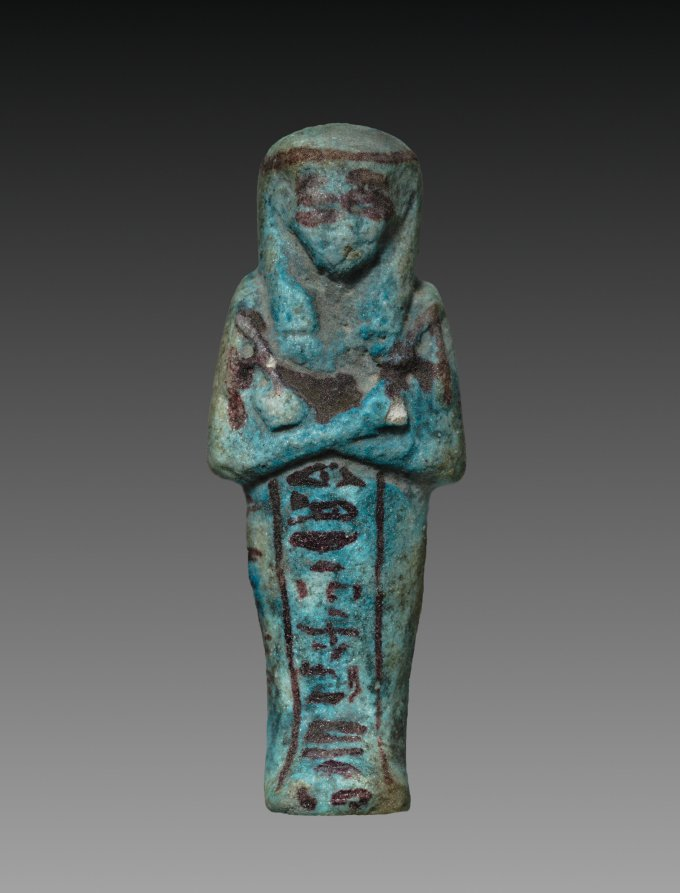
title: Shawabty of Tanetosorkon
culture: Egypt, Third Intermediate (1069–715 BCE), Dynasty 21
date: 1000–956 BCE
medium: turquoise faience with purple decoration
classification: Funerary Equipment